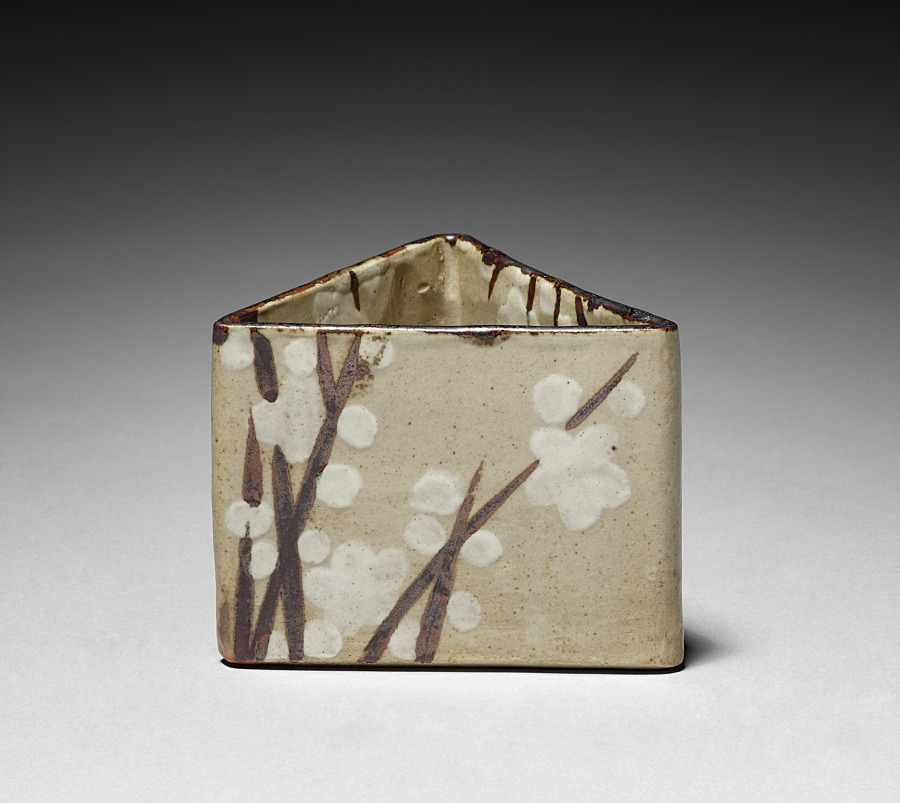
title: One of Five Serving Bowls (Mukozuke) with Prunus Design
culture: Japan, Edo period (1615–1868)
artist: school of Ogata Kenzan (Japanese, 1663–1743)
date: 1700s to mid-1800s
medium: Kyoto Ware: stoneware with underglaze iron oxide and slip decoration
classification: Ceramic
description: Note the rough, tan, clay bodies of these bowls with their deliberate irregularities. The design of branches was first painted in a black iron oxide, then the blossoms and buds in a white slip, followed by the application of a very thin transparent overglaze.